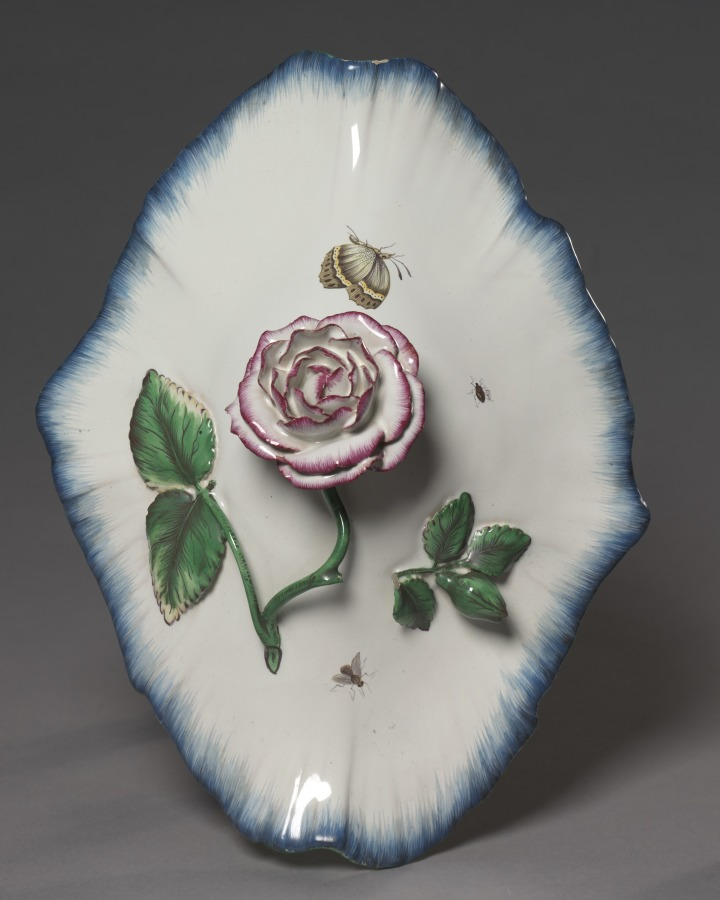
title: Cover for a Tureen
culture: France, Strasbourg, 18th century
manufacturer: Paul Hannong Factory (French)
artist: Strasbourg Factory (France)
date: c. 1750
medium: tin-glazed earthenware (faience) with enamel decoration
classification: Ceramic